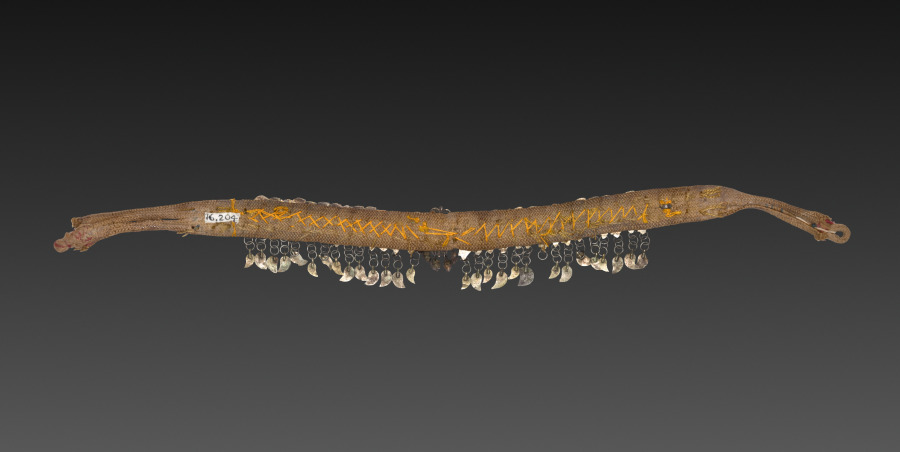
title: Armlet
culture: Silesia, 19th century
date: 1800s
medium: silver gilt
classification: Jewelry